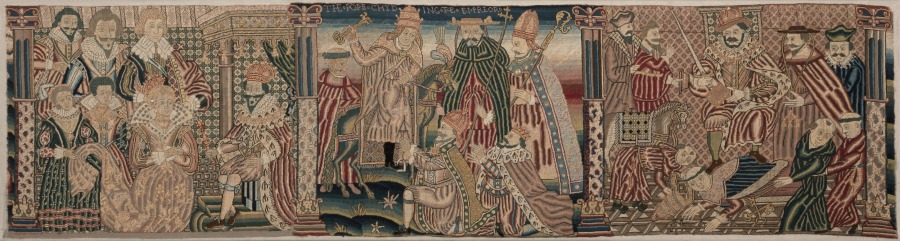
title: Sections of an Embroidered Frieze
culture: England, Period of Charles I (1625-1649), 17th century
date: 1625–1649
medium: petit-point embroidery; wool and silk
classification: Embroidery